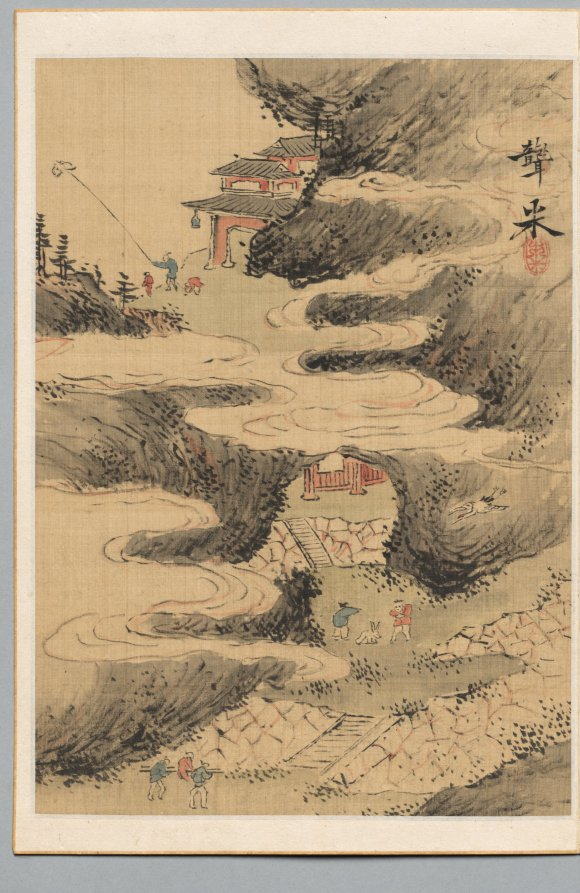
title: Children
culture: Japan, Edo period (1615–1868)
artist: Aoki Mokubei (Japanese, 1767–1833)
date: late 1700s–early 1800s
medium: leaf from a pair of folding albums; ink and light color on paper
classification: Portfolio